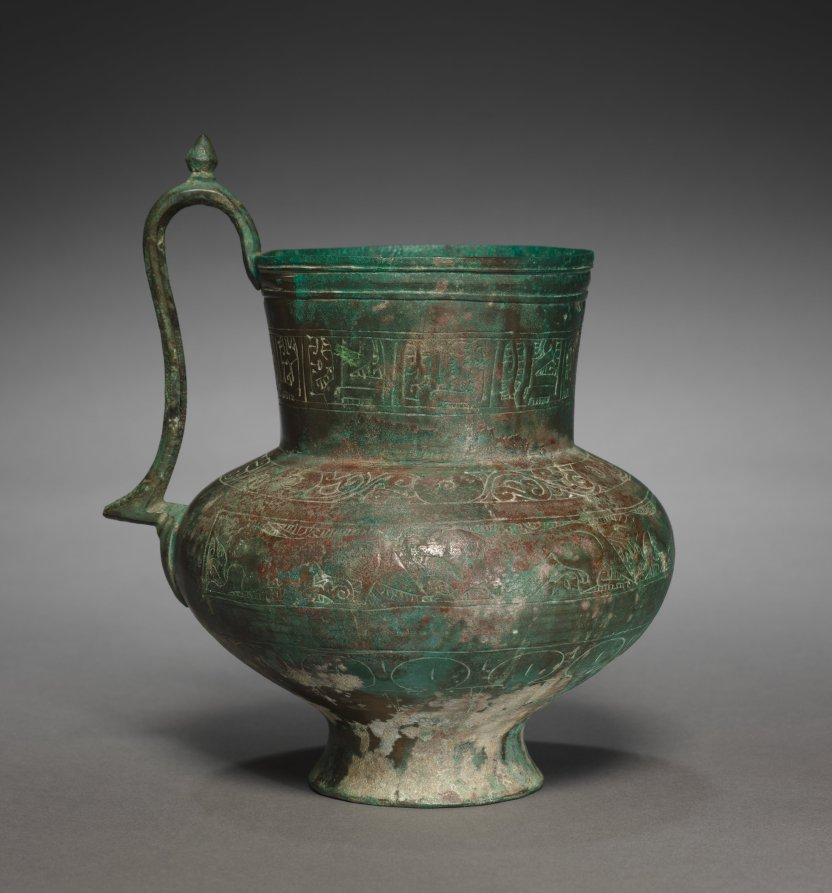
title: Jug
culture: Iran, Khurasan, Nishapur, Seljuk Period, 12th century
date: 1100s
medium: cast brass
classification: Metalwork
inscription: Kufic inscription, undeciphered